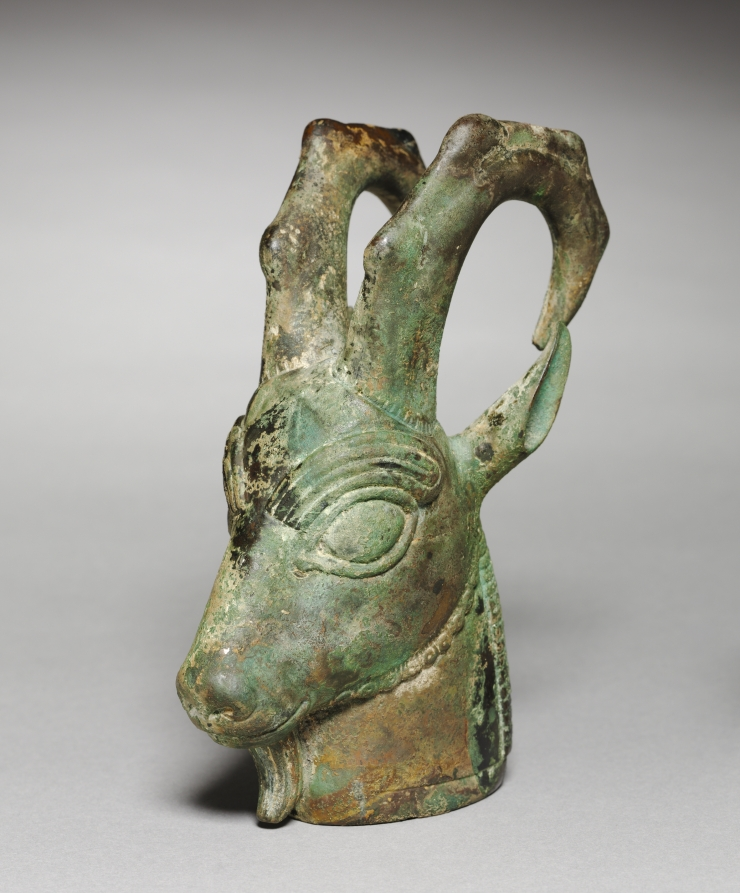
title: Ibex-Head Ornament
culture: Iran, Achaemenid (550–330 BCE)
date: c. 525–450 BCE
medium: bronze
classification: Sculpture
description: This may have decorated an ornate piece of furniture or a huge and heavily embellished bronze cauldron similar to that which the nearby bronze bull head once adorned.